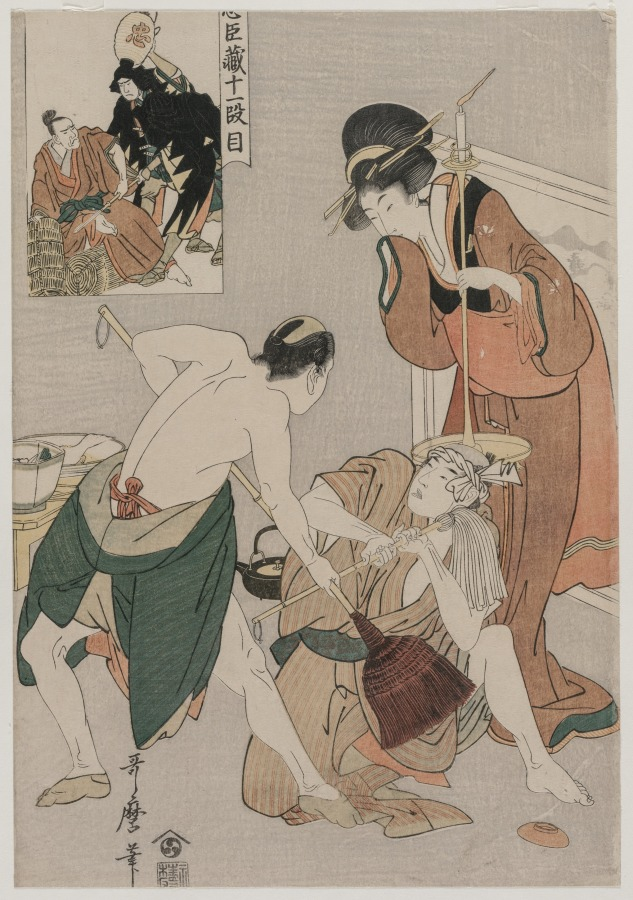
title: Chushingura: Act XI of The Storehouse of Loyalty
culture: Japan, Edo period (1615–1868)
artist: Kitagawa Utamaro (Japanese, c. 1754–1806)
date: late 1790s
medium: color woodblock print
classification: Print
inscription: Signature: Utamaro hitsu.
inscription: Publisher: Nishimuraya Yohachi (Eiju han, emblem).